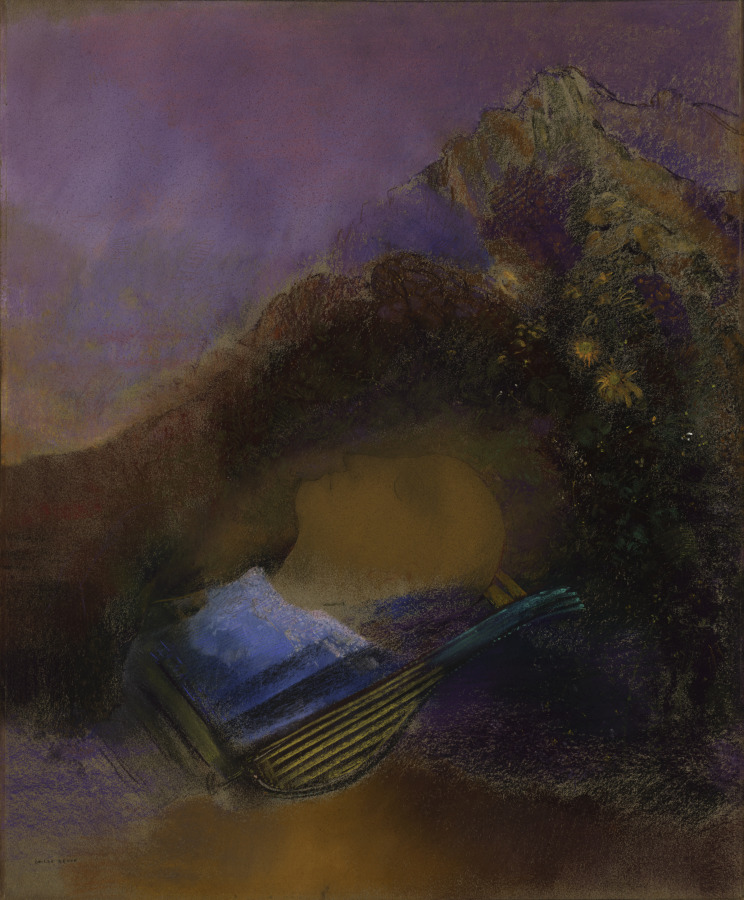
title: Orpheus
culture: France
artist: Odilon Redon (French, 1840–1916)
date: c. 1903–10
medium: pastel on brown paper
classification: Drawing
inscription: inscribed, lower left, in black pastel: ODILON REDON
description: Drawn in vivid layers of pastel crayon, this work depicts the head of the poet and musician Orpheus. The story of the god of music, whose music carried on after his death through his lyre and head, fascinated Redon, who related to Orpheus's dedication to his art. The subject also aligned with Redon's broader interest in dreams and spirituality around this time and he represented Orpheus several times throughout his career, in various media. Here, the god's head floats as if in stasis while Mount Parnassus—the home of Apollo and the Muses—soars from behind.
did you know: Another version of this pastel (now in the collection of the Musée Fabre de Montpellier) was part of a group of later works by Redon shown at the 1913 International Exhibition of Modern Art—better known as the Armory Show—which introduced the artist to American audiences.